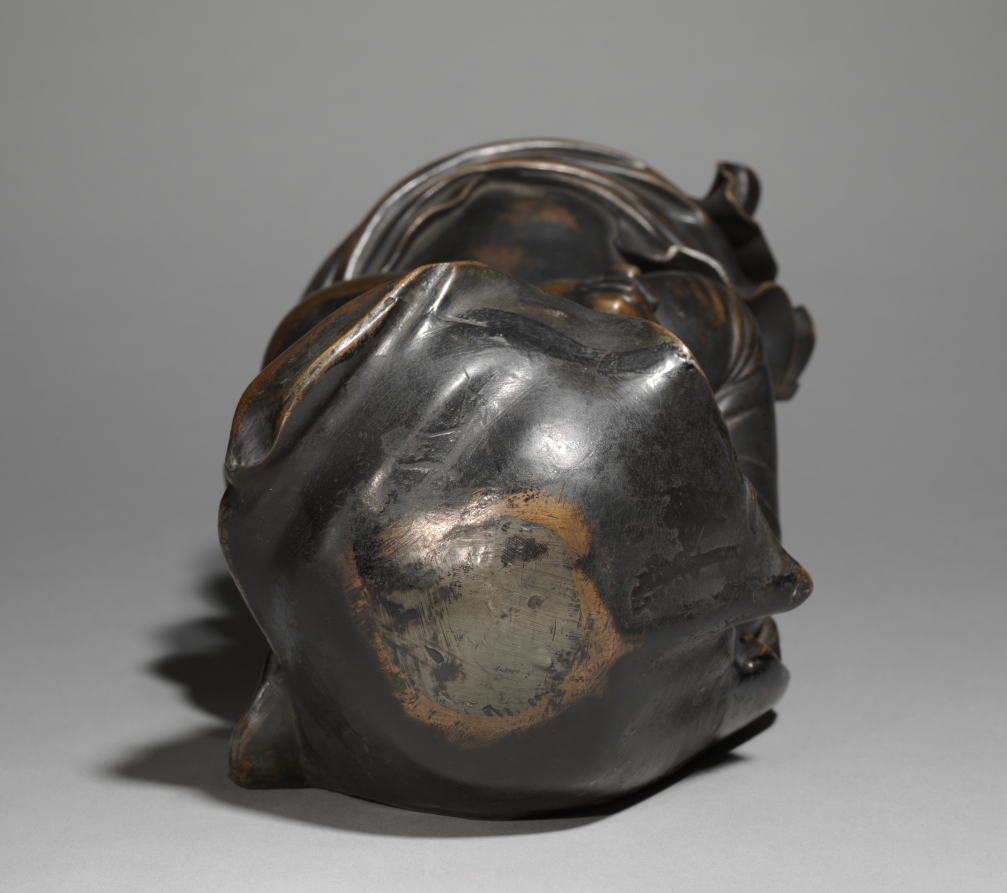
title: Winter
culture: France, 19th century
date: 1800s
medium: bronze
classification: Sculpture